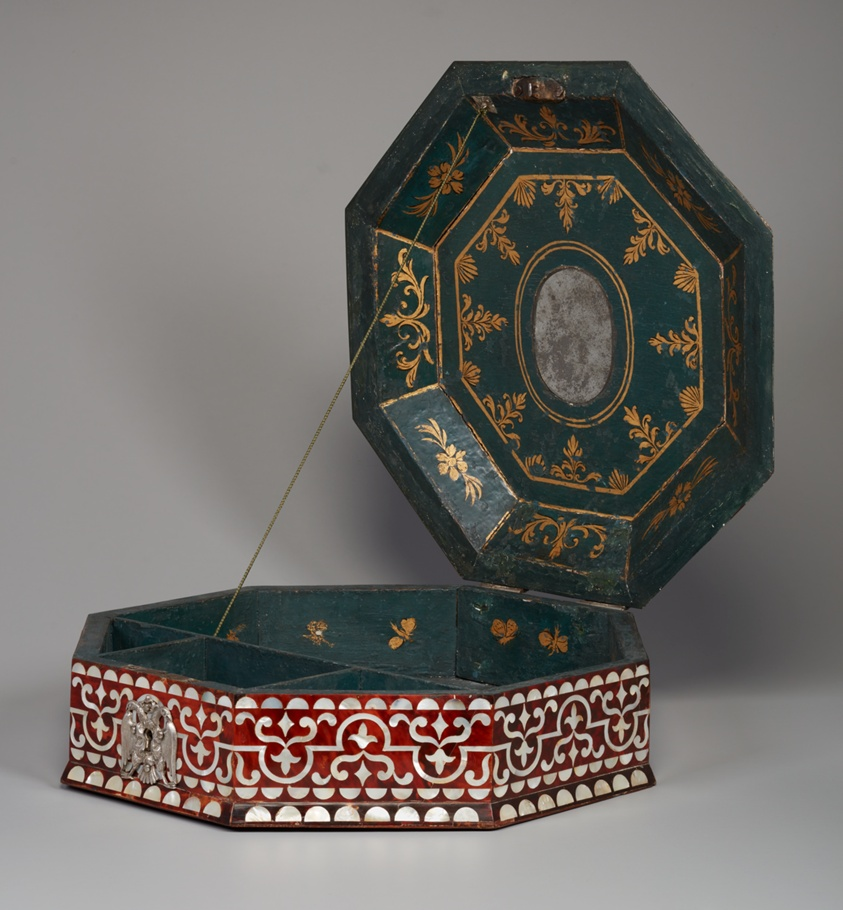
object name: Decorative Arts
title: Coffer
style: 18th Century, Baroque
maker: Peruvian; Probably Lima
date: c. 1750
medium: Wood, tortoiseshell, mother-of-pearl, silver, glass, and paint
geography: Lima department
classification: box; inlay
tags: box, coffer